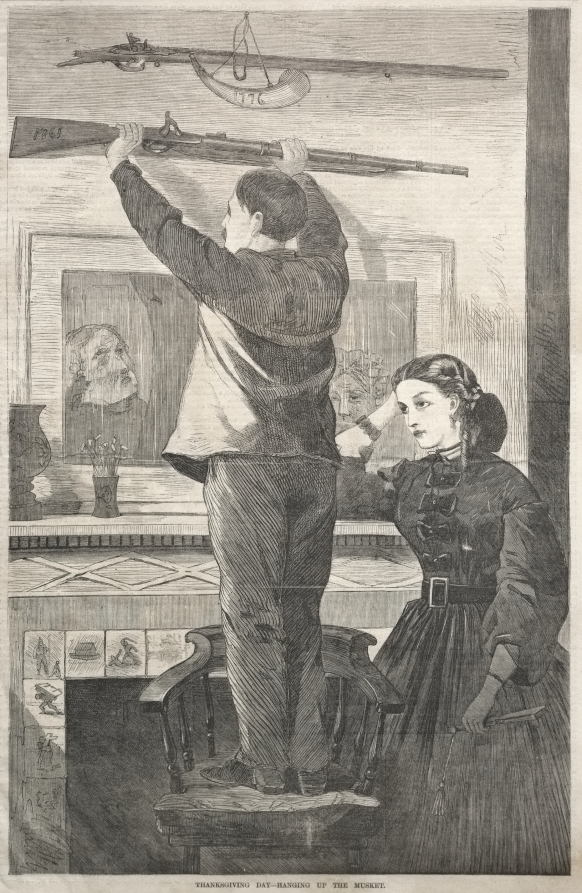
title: Thanksgiving Day - Hanging up the Musket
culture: America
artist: Winslow Homer (American, 1836–1910)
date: 1865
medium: wood engraving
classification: Print